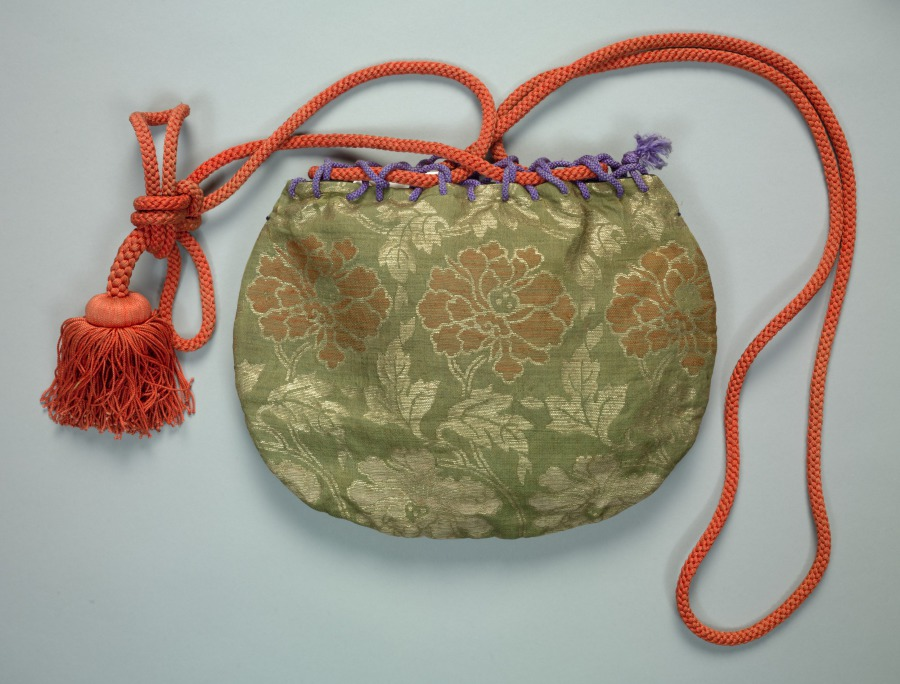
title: Bag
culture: Japan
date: 1700s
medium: Silk: brocaded with metal thread weft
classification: Garment